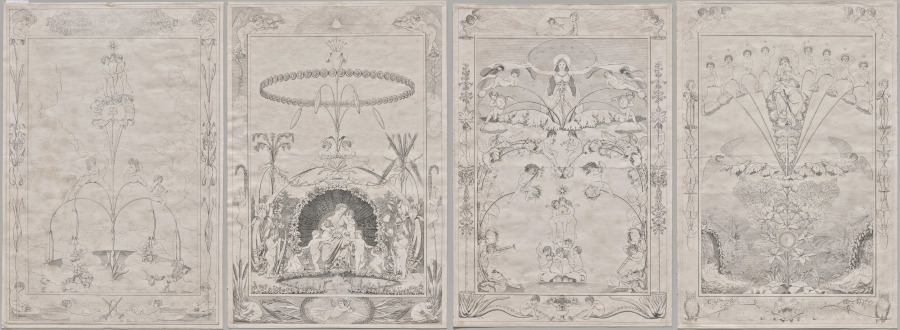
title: Times of Day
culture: Germany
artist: Philipp Otto Runge (German, 1777–1810)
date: 1803–05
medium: Set of four etchings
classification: Print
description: Phillip Otto Runge’s large-scale, four-part print series, Tageszeiten (Times of Day), is a landmark of German Romantic printmaking, capturing the “new art” promoted by Runge and his contemporary, Caspar David Friedrich, one rooted in a more personal and spiritual response to nature. Runge presents allegories of nature as a means to understand God and the sublime on earth. His four-part series represents not only the four times of day but also the seasons and the stages of human life, while contrasting eternal time with human time through various literary and religious references. Viewing the series from Morning to Night, seedlings emerge from the earth, bloom, decay, and die. Young spirits or children are born, mature, and grow old, eventually entering a sleep reminiscent of death. A female figure appearing in two scenes, possibly Mother Nature, inspires abundance and then embraces its decline, suggesting nature’s continuity despite human mortality. In each plate, Runge contrasts eternal time with human time, or spirituality with physicality, by contrasting the iconography in the borders with that in the centers.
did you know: After receiving a set of Times of Day as a gift from the artist, the German author Johann Wolfgang von Goethe (1749–1832) apparently exclaimed, “it’s enough to drive you crazy—beautiful, and mad at the same time!”